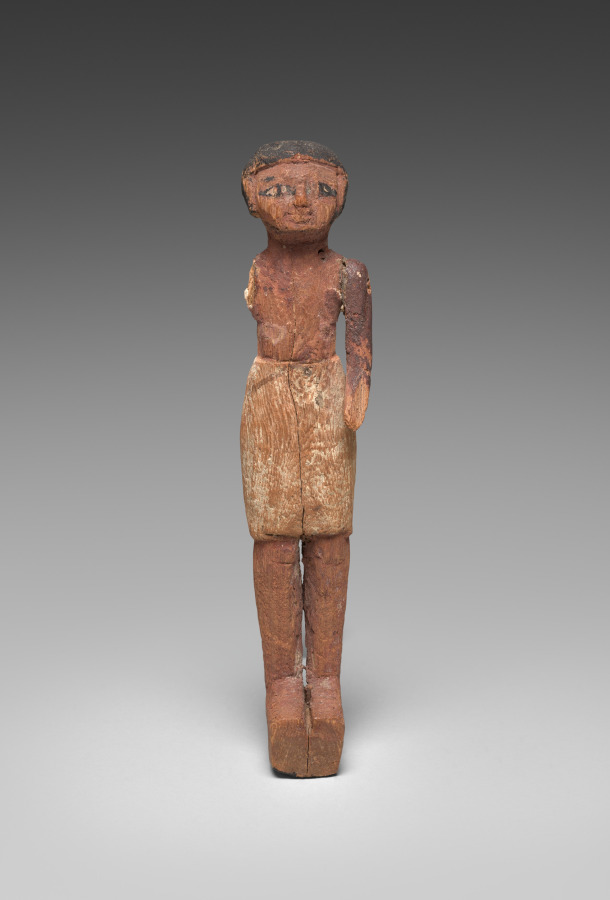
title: Model Figure of a Man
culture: Egypt, Middle Kingdom (2040–1648 BCE), Dynasty 12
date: 1980–1801 BCE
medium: painted wood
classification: Funerary Equipment